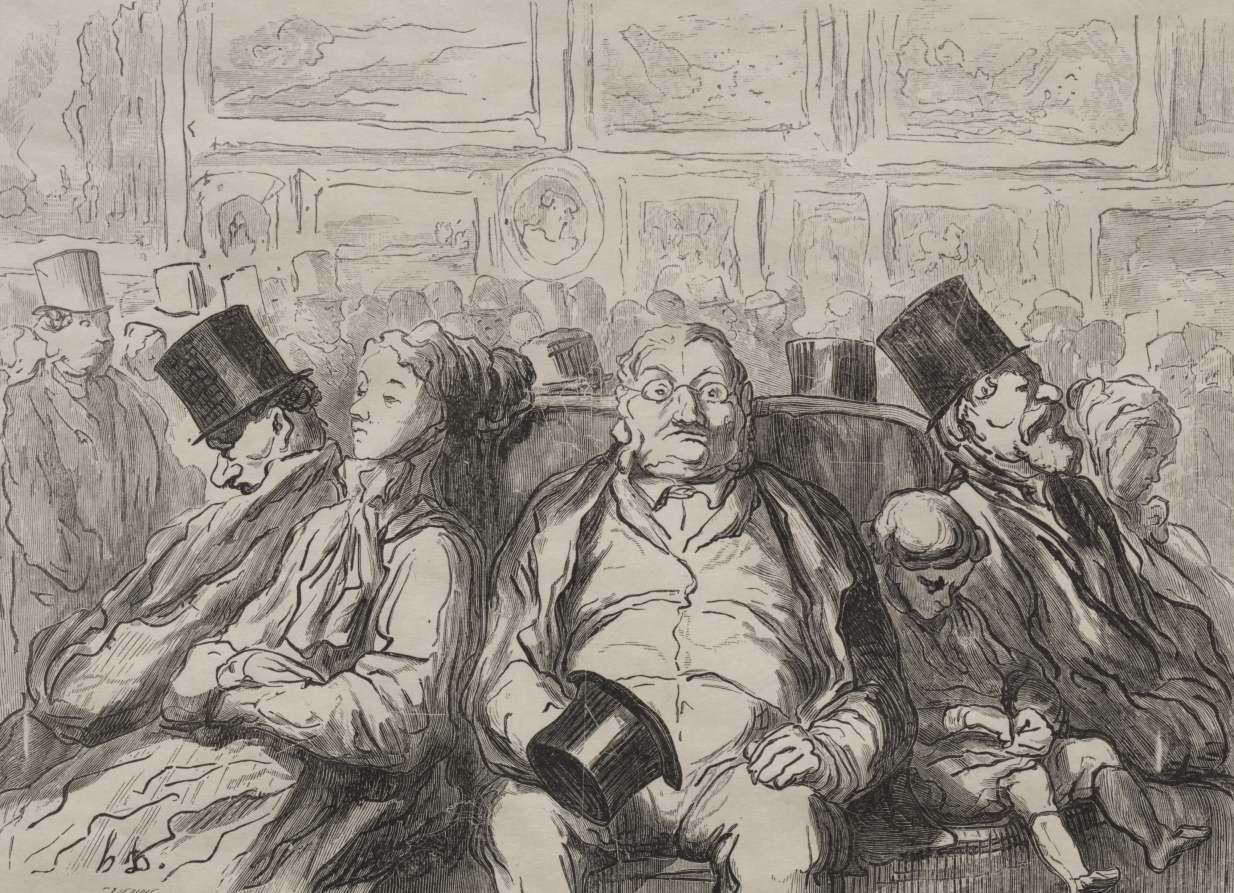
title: Paris, The Great Art Exhibition: A Moment of Rest in the Salon Carré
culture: France, 19th century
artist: Honoré Daumier (French, 1808–1879)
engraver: Étienne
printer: François Louis Schmied (Swiss, 1873–1941)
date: 1868, printed 1920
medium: wood engraving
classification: Print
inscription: Lower margin, in pencil: 40/75 ; red stamp: FLS